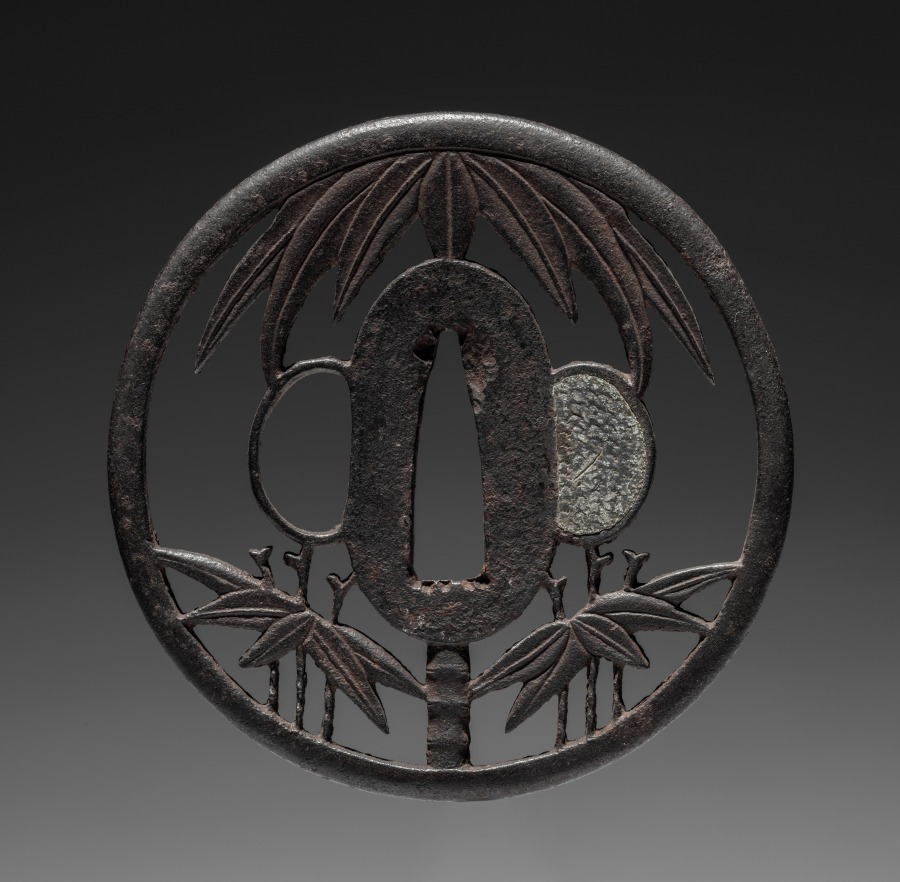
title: Sword Guard (Tsuba) with Bamboo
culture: Japan, possibly Edo period (1615-1868)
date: c. 1615–1868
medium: iron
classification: Arms and Armor